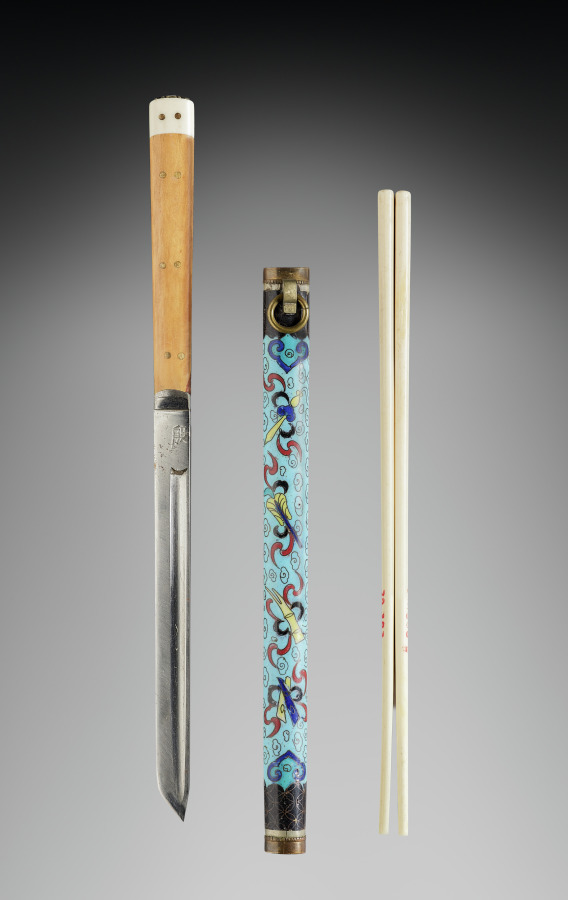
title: Chopstick and Knife Kit -Souvenir Trade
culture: Japan, Meiji period (1868–1912) to Taishō period (1912–26)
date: early 1900s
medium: enamel, wood, walrus ivory or bone, metal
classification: Implements